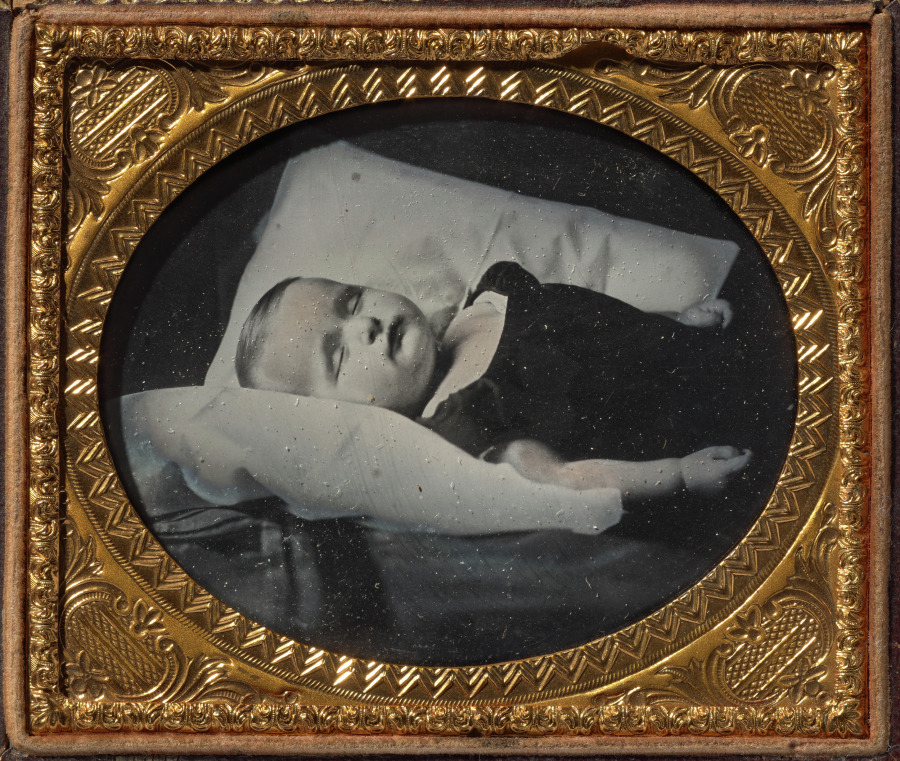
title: Post-Mortem on Pillow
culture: America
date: c. 1855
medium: ambrotype, tinted, sixth plate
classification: Photograph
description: Children have always been particularly cherished subjects for photography. Portraits were made to preserve the memory of their stages of growth and, in an age when long-distance travel was rare, to share with faraway relatives. And, for a sadder reason: in 1840 an estimated one-third of children died before age five. Photography offered grieving parents the opportunity to immortalize their children’s features. This tragic genre of photographs, later called “post-mortems,” often depicts the children in fine clothing, laying down with eyes shut, as if merely napping.